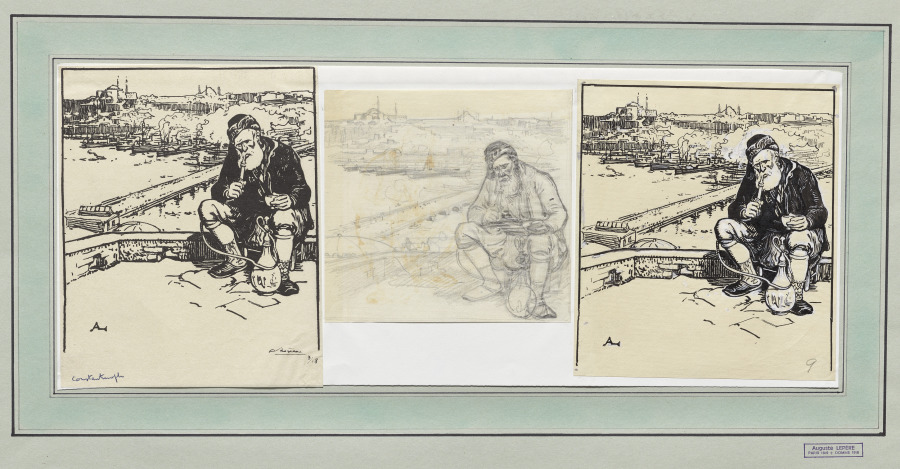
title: Constantinople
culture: France, 20th century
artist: Auguste Louis Lepère (French, 1849–1918)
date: 1914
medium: pen and black ink and white highlights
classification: Drawing